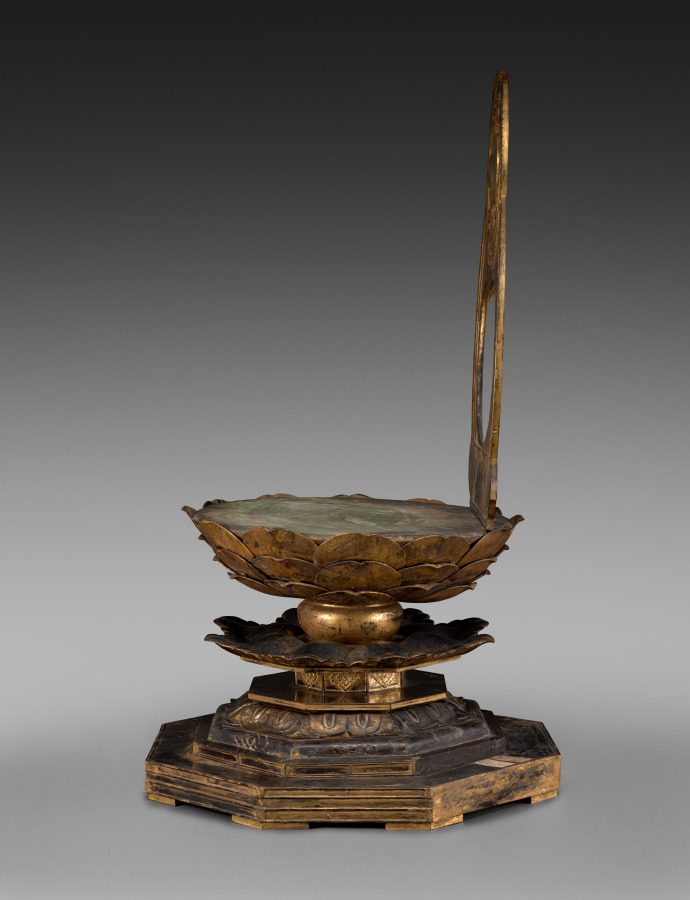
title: Seated Buddha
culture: Japan, Heian period (794–1185)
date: 1100s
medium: gilded wood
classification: Sculpture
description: Composed of a number of hollowed-out pieces of wood that were then covered with lacquer and gilding, this sculpture served as an image of worship in one of the small temples surrounding Kōfukuji, a major Buddhist temple in Nara, Japan. Like many Buddhas, this figure has its right hand positioned in a gesture meaning "fear not." The left hand is a replacement, so its original gesture, a clue to this Buddha's identity, is unknown. However, as the left foot is exposed over the garment, in lotus position, it may have been created as a Medicine Master Buddha, Yakushi Nyorai in Japanese, or the Buddha of our era, Shakyamuni.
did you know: A 1906 photo taken at Kōfukuji shows this sculpture without a halo or left hand.